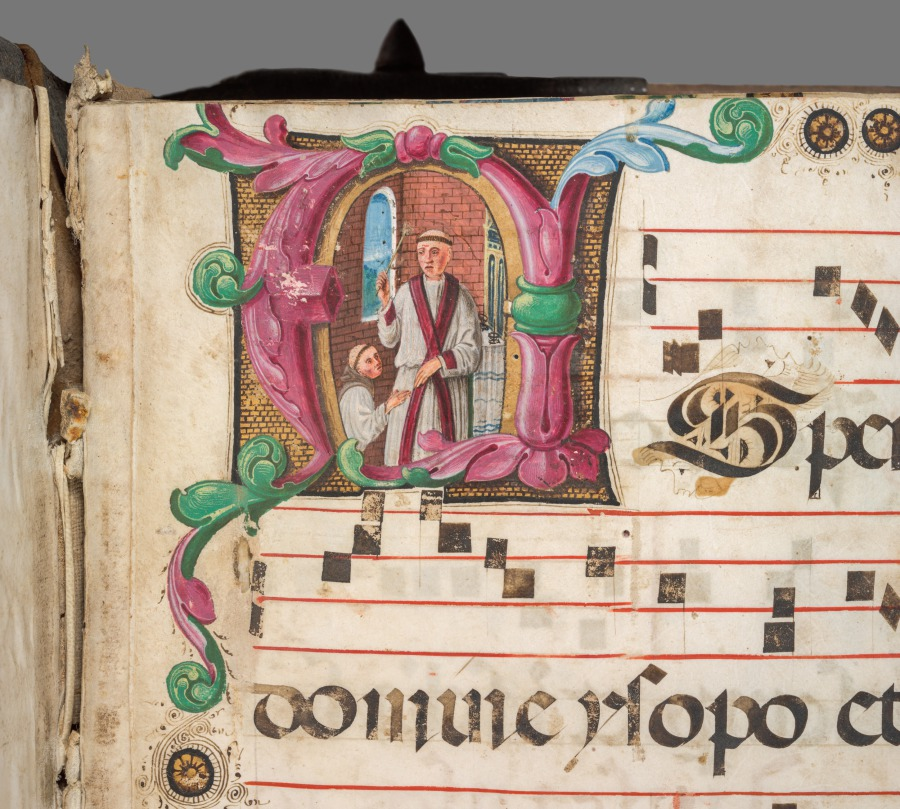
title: Gradual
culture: Italy, Verona(?)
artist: circle of Girolamo dai Libri (Italian, 1474–1555)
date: c. 1520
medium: ink, tempera, and gold on parchment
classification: Manuscript